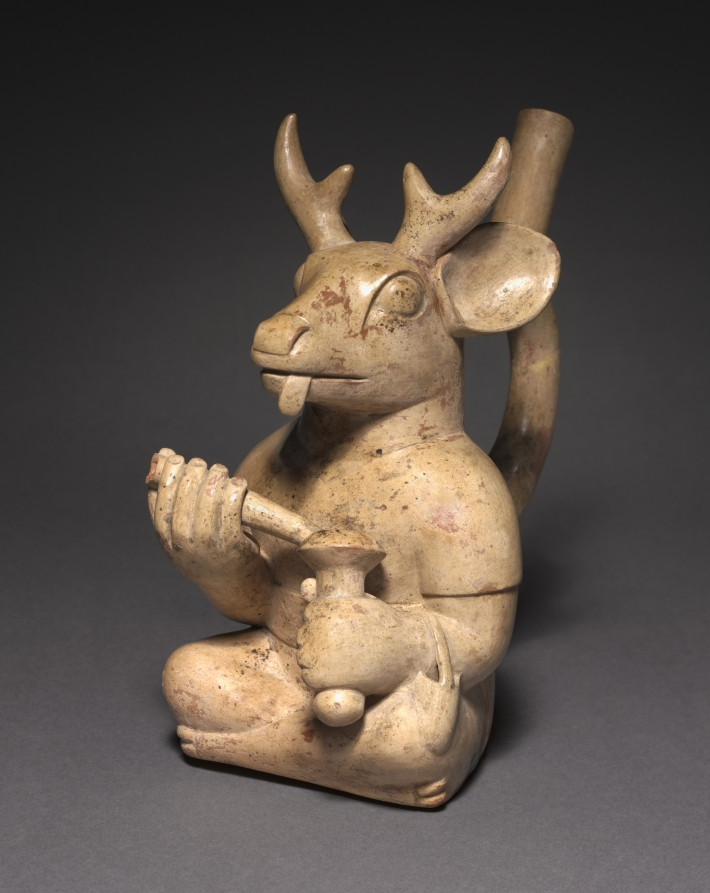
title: Deer-Headed Figure Vessel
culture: Central Andes, North Coast, Moche people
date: 200–850 CE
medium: ceramic, slip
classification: Vessels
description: Moche imagery includes an intriguing world of creatures that mingle traits from different realms: beans sprout human legs and race up a spout, jars leap with human feet to pour themselves, and animals wield weapons in two hands. This figure, with a stag’s head but a human’s body, is an example. He is engaged in a coca-leaf chewing ritual and thus holds a bag for the leaves along with a container of powdered lime that is one of the ritual’s key ingredients.